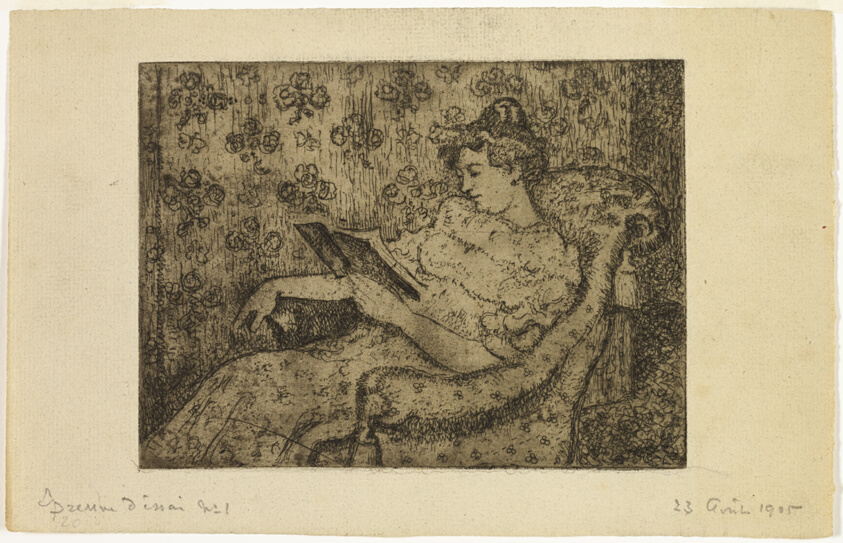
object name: Print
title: Seated Woman Reading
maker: Georges Lemmen (Belgian, 1865-1916)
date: 1905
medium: Etching on tan laid paper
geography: Belgium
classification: etching; paper; print; prints and drawing